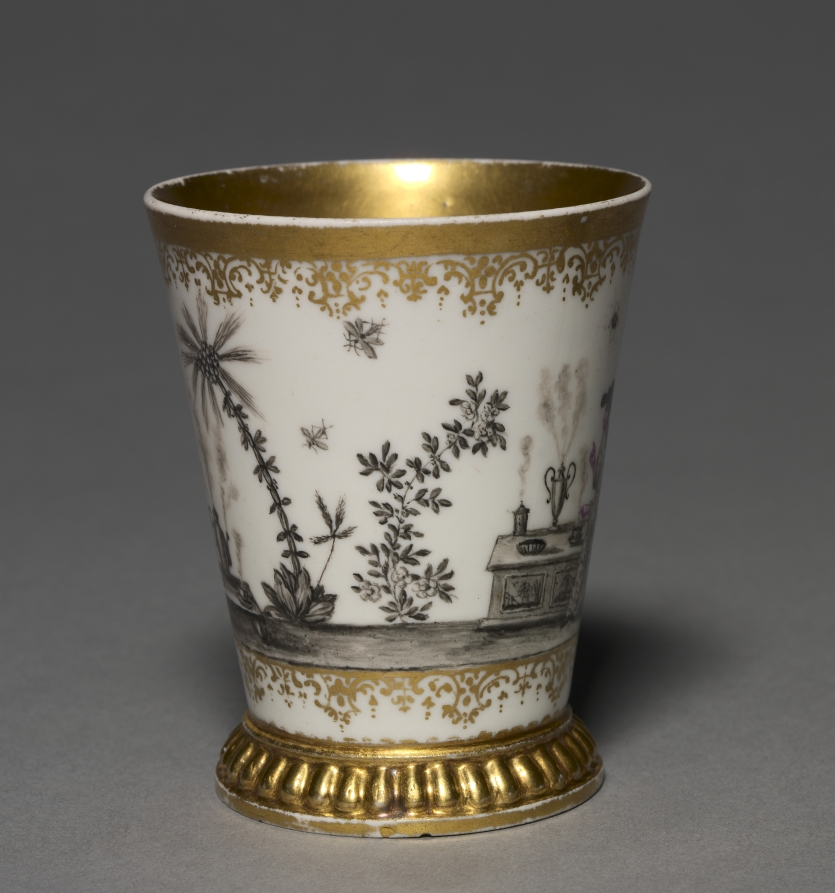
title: Beaker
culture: Germany, Meissen, early 18th century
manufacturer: Meissen Porcelain Factory (German, est. c. 1710)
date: before 1720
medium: porcelain, interior gilded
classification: Ceramic